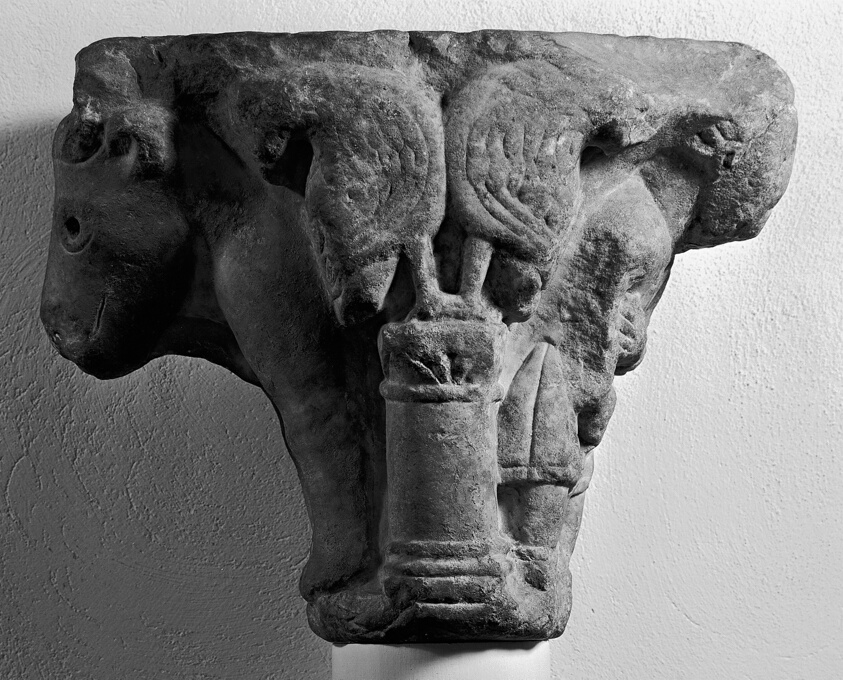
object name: Sculpture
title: Capital with Bull and Worker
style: medieval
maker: Italian; Lombardy or Apulia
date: 1100/25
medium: Marble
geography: Italy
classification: architectural sculpture; sculpture; Italian; marble; sculpture/stone; stone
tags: architectural fragment, figure, man, labor, animals, bull, architectural detail, architectural, architechture, architectural fragments